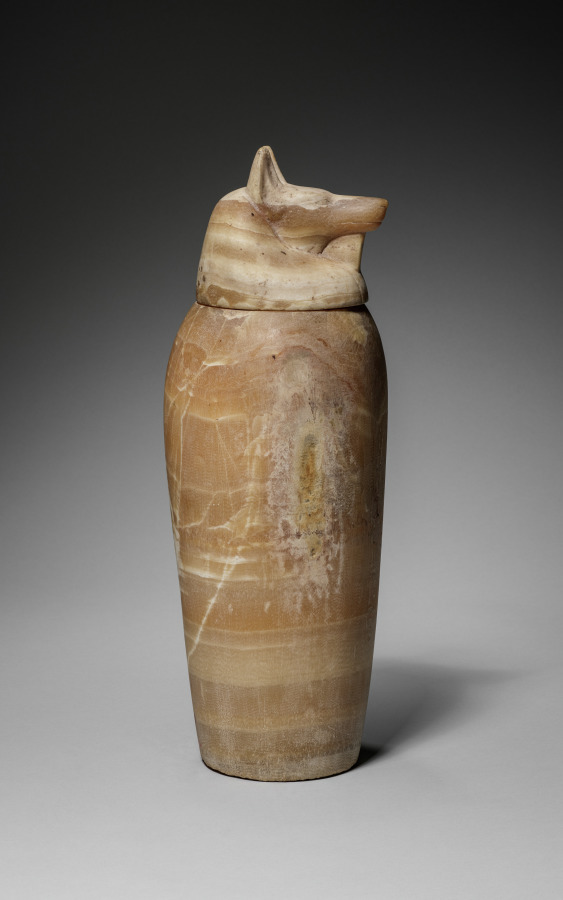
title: Canopic Jar with Jackal's Head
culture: Egypt, Late period (715–332 BCE), Dynasty 26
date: 664–525 BCE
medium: travertine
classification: Funerary Equipment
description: In the process of mummification, the liver, lungs, stomach, and intestines were removed, separately embalmed, and stored in specialized jars known as canopic jars (after a sailor in Greek mythology, who died at the town of Canopus in the Nile Delta and was worshipped there in the form of a human-headed jar). Each organ was identified with one of four funerary deities collectively known as the Sons of Horus: the liver with Imsety (man's head), the lungs with Hapy (baboon's head), the stomach with Duamutef (jackal's head), and the intestines with Qebehsenuef (falcon's head). It was their duty to protect the deceased and restore to him his body parts in the hereafter.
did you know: This jar is made of travertine stone-- subtle in color and with a captivating natural pattern-- with hieroglyphics carved on the front. Such jars were used to hold internal organs of the deceased and to preserve them for the afterlife.